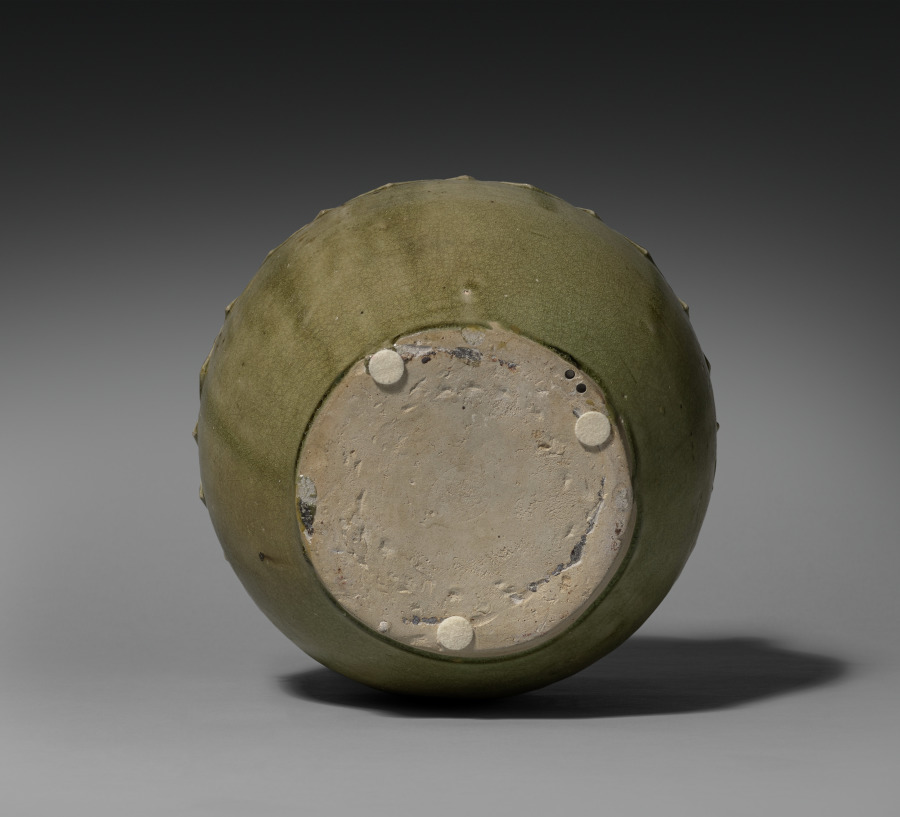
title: Covered Jar with Carved Lotus Petals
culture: China, Northern Dynasties period (386-581)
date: 386–581 CE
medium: Glazed stoneware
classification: Ceramic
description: This jar still has its original cover, which is rare among surviving examples. Its missing knob most likely had the shape of a lotus bud. Beautifully carved lotus petals cover the vessel’s shoulder and lid under a translucent green glaze. In Buddhism, the lotus is a flower symbolizing purity and detachment from worldly affairs; its presence suggests that this vessel was meant to be used in a religious context. The well-crafted double loop handles may have held a silk cloth or other textile that would have been folded over the lid to keep it in place. This aesthetic prefigures the celebrated green celadons in adjacent regions.